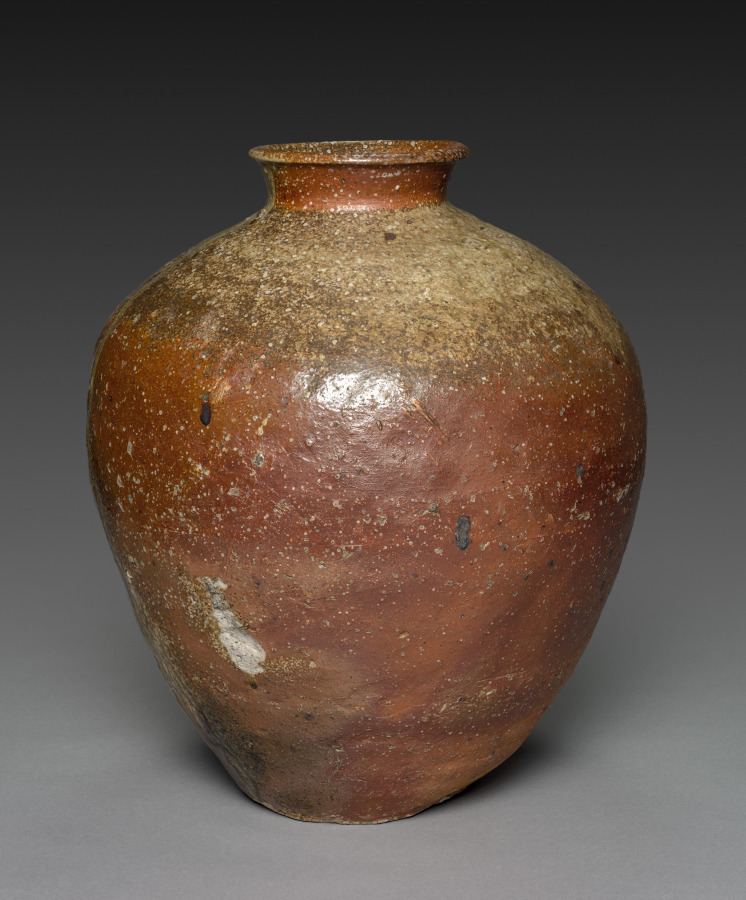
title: Storage Jar (Tsubo)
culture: Japan, Muromachi period (1392–1573)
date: late 1400s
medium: Stoneware with natural ash glaze (Shigaraki ware)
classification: Ceramic